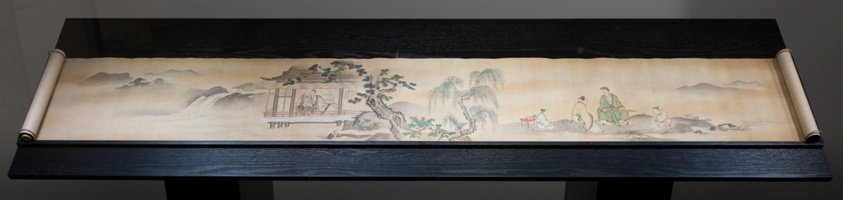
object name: Painting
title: The Four Accomplishments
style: Japanese (culture or style)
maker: Kano Tsunenobu; Japanese, 1636-1713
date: c. 1700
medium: Ink and colors on silk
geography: Japan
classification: handscroll; painting; asian art